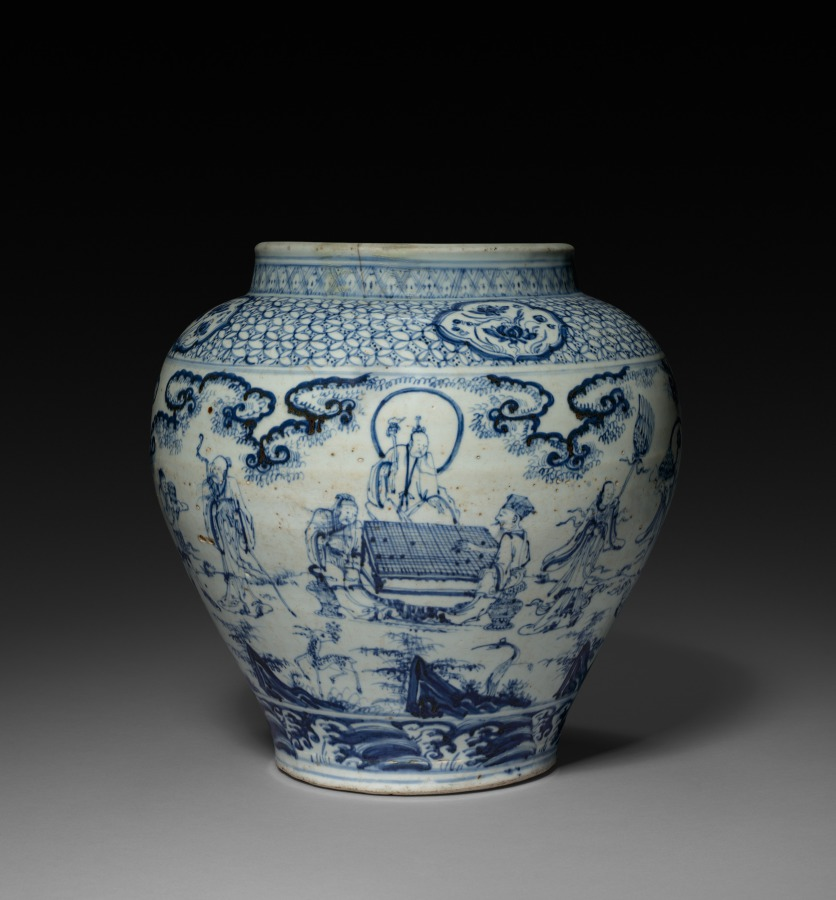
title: Jar with Scenes from the Land of Daoist Immortals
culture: China, Ming dynasty (1368–1644)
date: early 1400s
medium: porcelain with underglaze blue decoration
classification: Ceramic